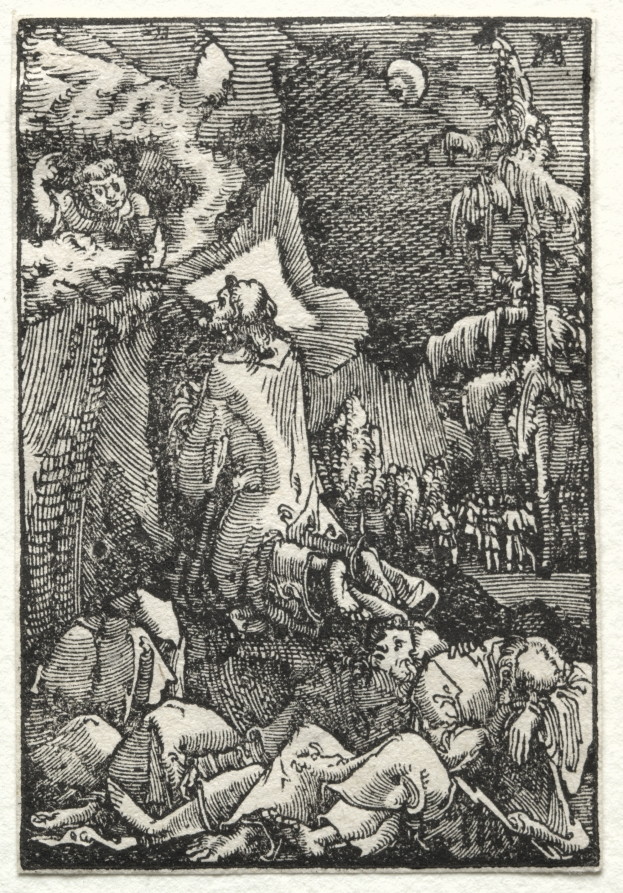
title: The Fall and Redemption of Man: Chirst on the Mount of Olives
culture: Germany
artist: Albrecht Altdorfer (German, c. 1480–1538)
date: c. 1515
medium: woodcut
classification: Print